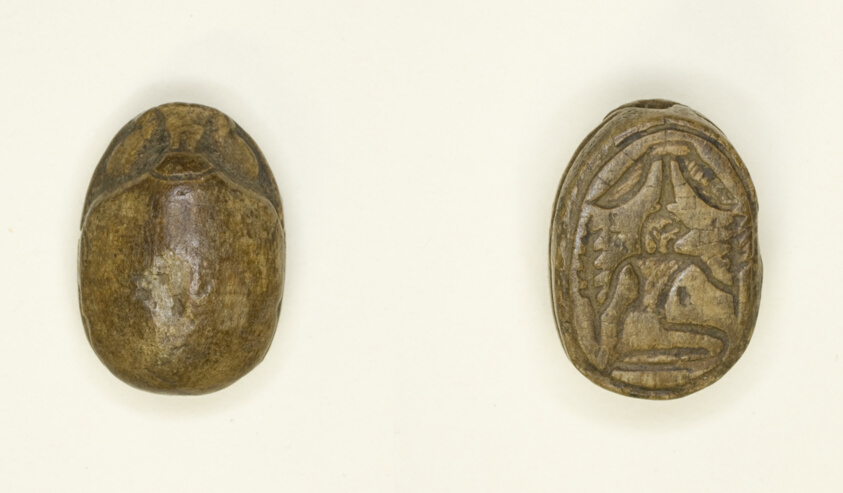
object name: Costume and Accessories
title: Scarab: Wish Formula (?)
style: egyptian, third intermediate period, new kingdom, late period (egyptian), ancient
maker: Egyptian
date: New Kingdom–Late Period, Dynasties 18–26 (about 1550–525 BCE)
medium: Steatite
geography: Egypt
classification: scarab; ancient art; costume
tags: scarab beetle, men, plants